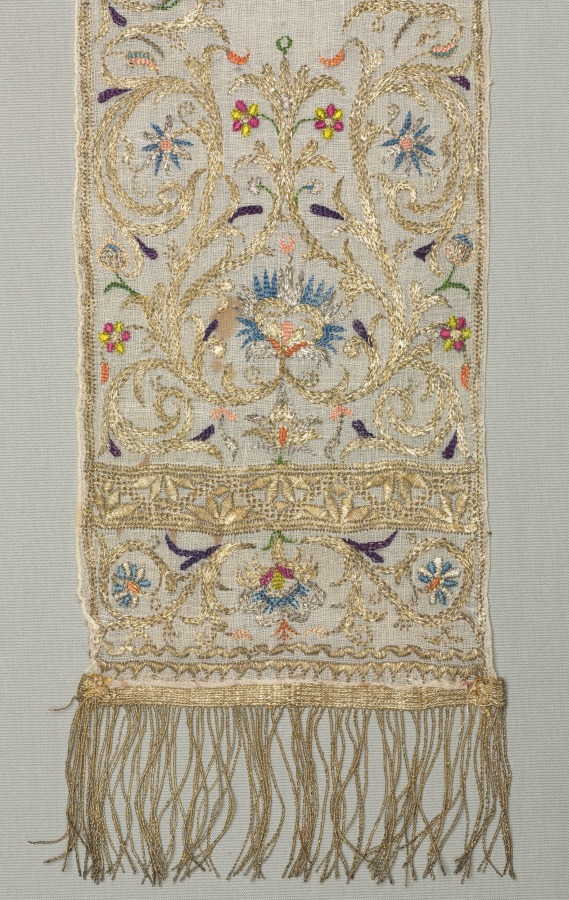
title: Headdress (beniqa)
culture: Africa, North Africa, Algeria, Algerian embroiderer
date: 1800s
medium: Linen, silk, and metal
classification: Embroidery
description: Beniqa were stylish headdresses that women wore when visiting the hammam (steam bath). The linen fabric absorbed the damp from their wet hair. With its gold and silver metal thread, shimmering spangles, and brightly colored threads forming flowers and vines, this beniqa was a ceremonial garment worn for the ritual bath before a Jewish woman’s wedding; it was also part of her dowry. After toweling off her hair, a woman made two braids, which she would then twist into the cap’s fabric and tie on her head, with the gold-fringed ends trailing down.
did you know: Slender gray lines made in pencil or chalk trace out unstitched designs on this elaborate ritual cap.